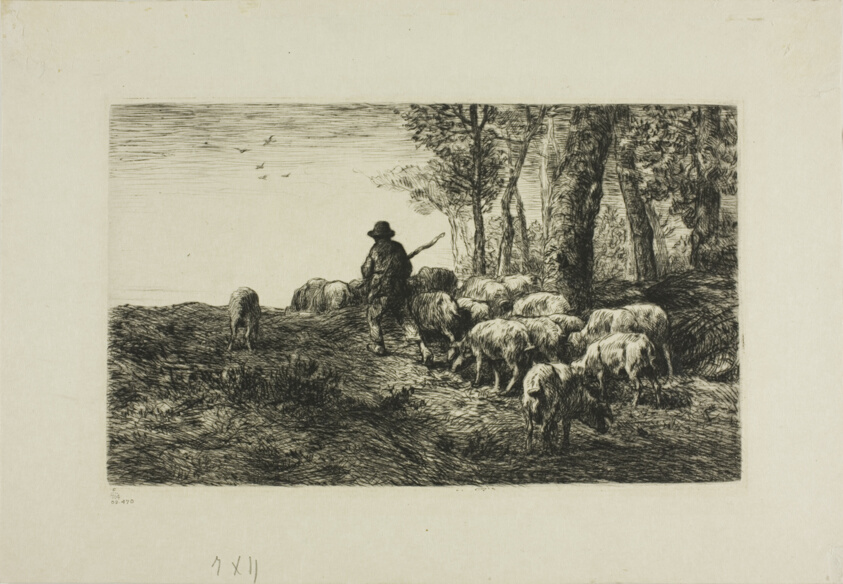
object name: Print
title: Man with Herd of Pigs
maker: Charles Émile Jacque (French, 1813-1894)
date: c. 1866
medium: Etching and drypoint on paper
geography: France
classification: etching; print; prints and drawing